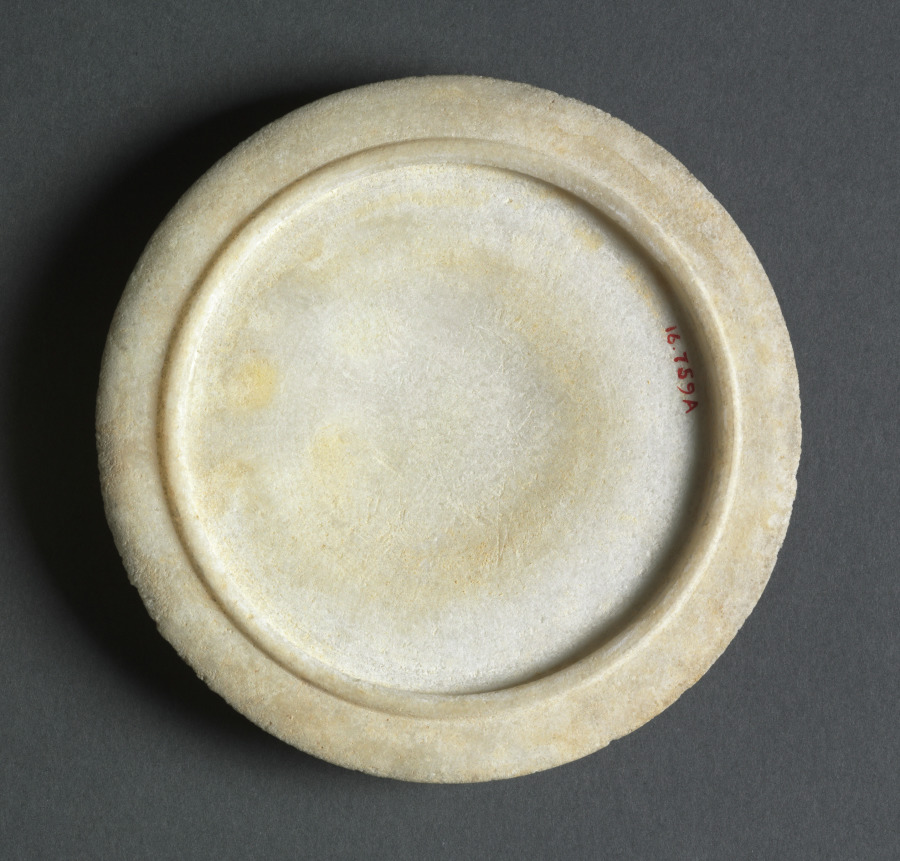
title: Pyxis (lid)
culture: Greece, Attic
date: 400–300 BCE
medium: marble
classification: Stone